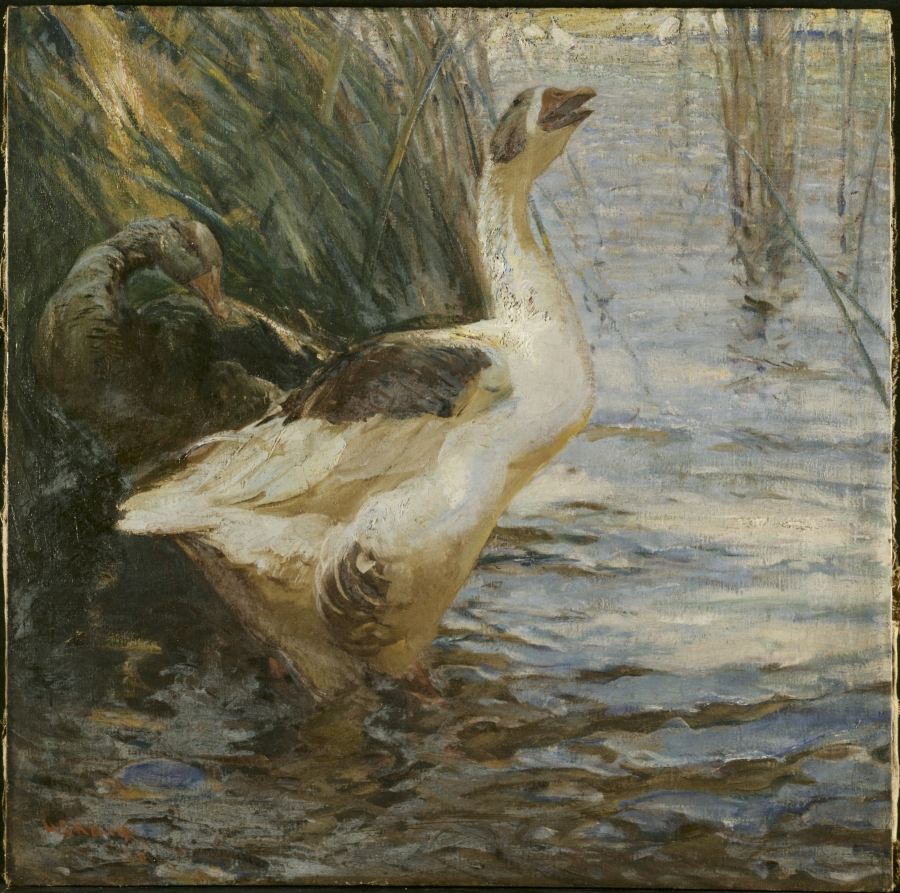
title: Disturbed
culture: America, Ohio, Cleveland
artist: Henry Keller (American, born Germany, 1869–1949)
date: 1908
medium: oil on canvas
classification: Painting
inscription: signed lower left: H. G. Keller, 08.